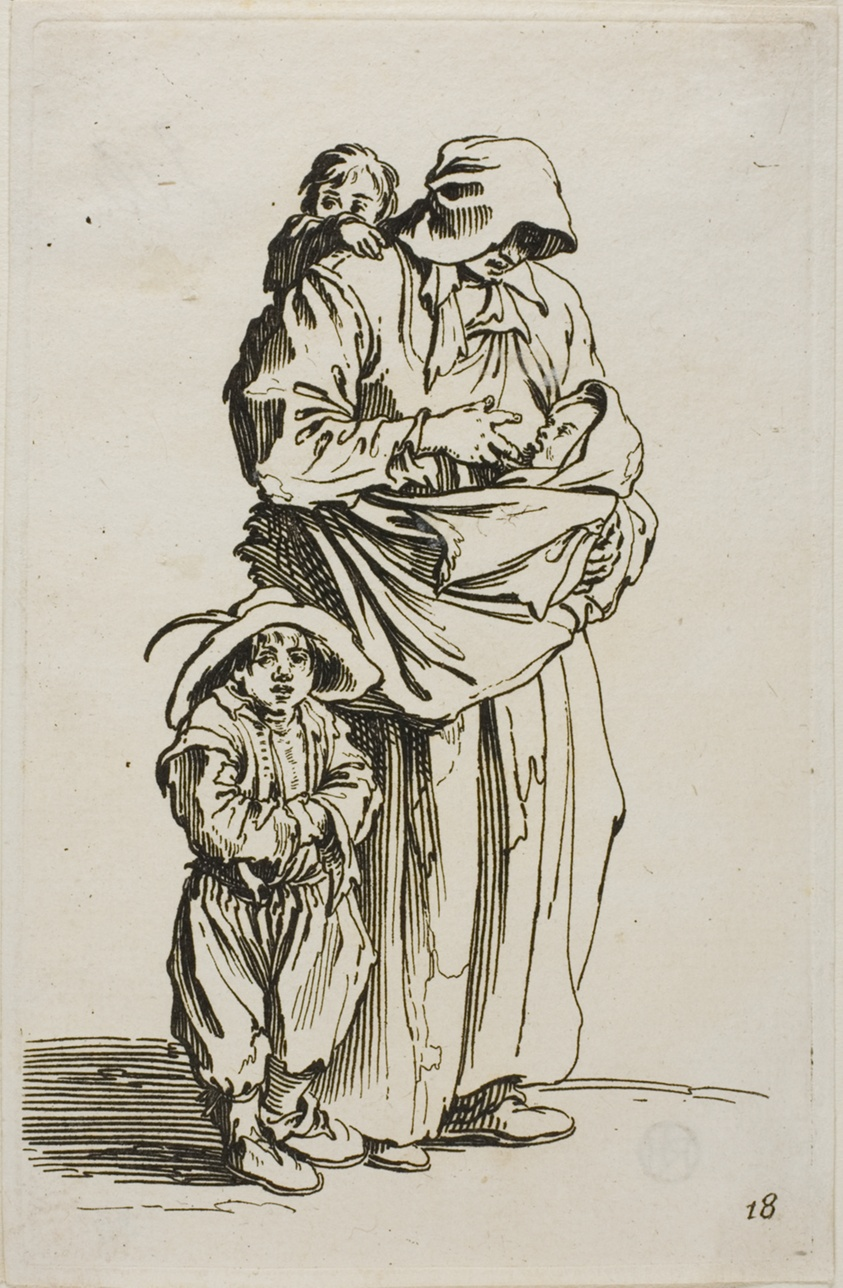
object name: Print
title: A Mother with her Three Children, plate 18 from The Beggars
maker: Jacques Callot (French, 1592-1635)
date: c. 1622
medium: Etching on paper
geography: France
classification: etching; print; prints and drawing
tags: mothers, babies, children, nursing (breast feeding)